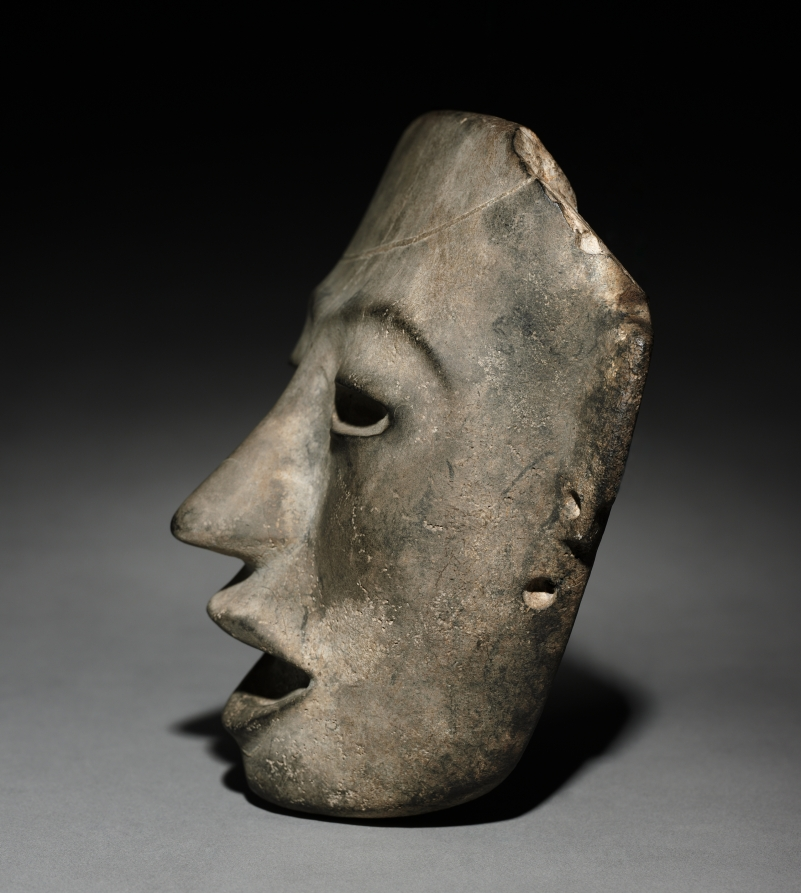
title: Mask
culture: Central Mexico, Teotihuacán style, Classic period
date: 1–550 CE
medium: stone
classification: Sculpture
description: Many Teotihuacán masks were once tied to something via holes on the back--perhaps a body-shaped form dressed in garments, ornaments, and a headdress that identified the figure. The stone masks’ eyes and mouths once held inlays representing irises, pupils, and teeth.